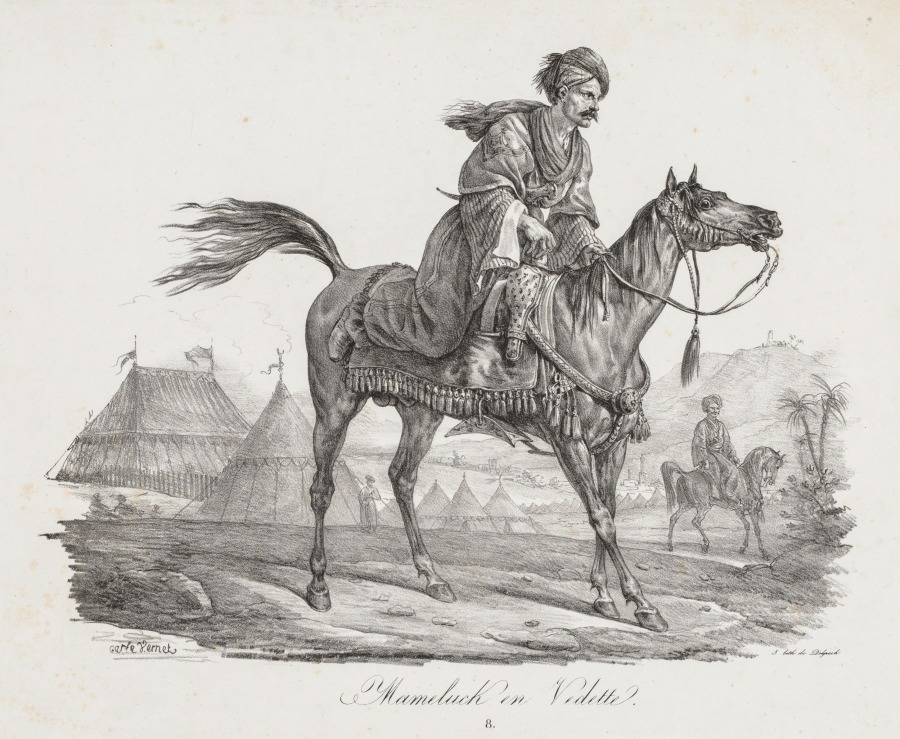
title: Large Suite of Horses: Mounted Mamelucke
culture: France, 19th century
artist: Carle Vernet (French, 1758–1836)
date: c. 1818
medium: lithograph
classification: Print